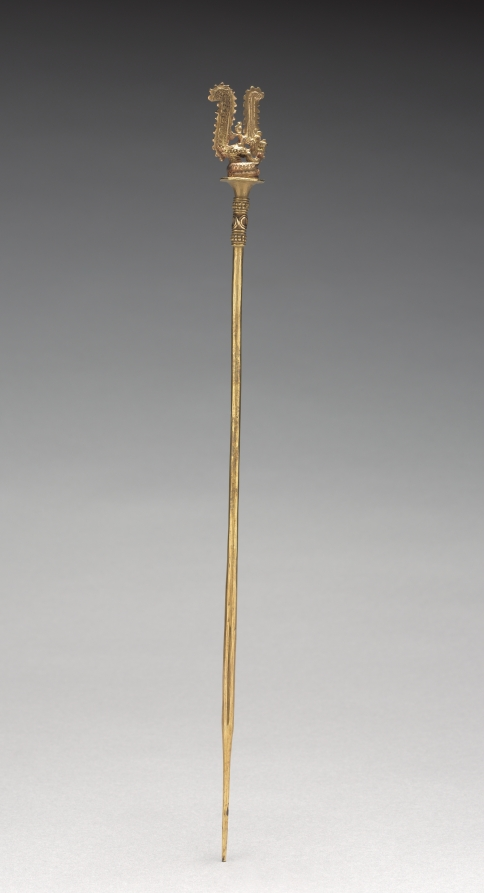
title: Lime Dipper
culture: Colombia, Calima region, Yotoco style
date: c. 1–800 CE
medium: gold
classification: Metalwork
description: Coca-leaf chewing was a widespread ritual in ancient South America. Utensils included a container and a dipper or spoon for powdered lime (made from seashells), added to the coca to enhance its gentle, stimulating effect. Colombian cultures are especially known for transforming these utensils into works of art made of precious metal. The image on the tallest dipper is wonderfully complex. A serpent coils at the bottom, beneath a snarling animal with a huge, vertical tail. This animal has a tiny monkey on its back; the monkey also has a huge tail, which rests on the first animal's head like a headdress. This intricate image was created with the lost-wax casting process.